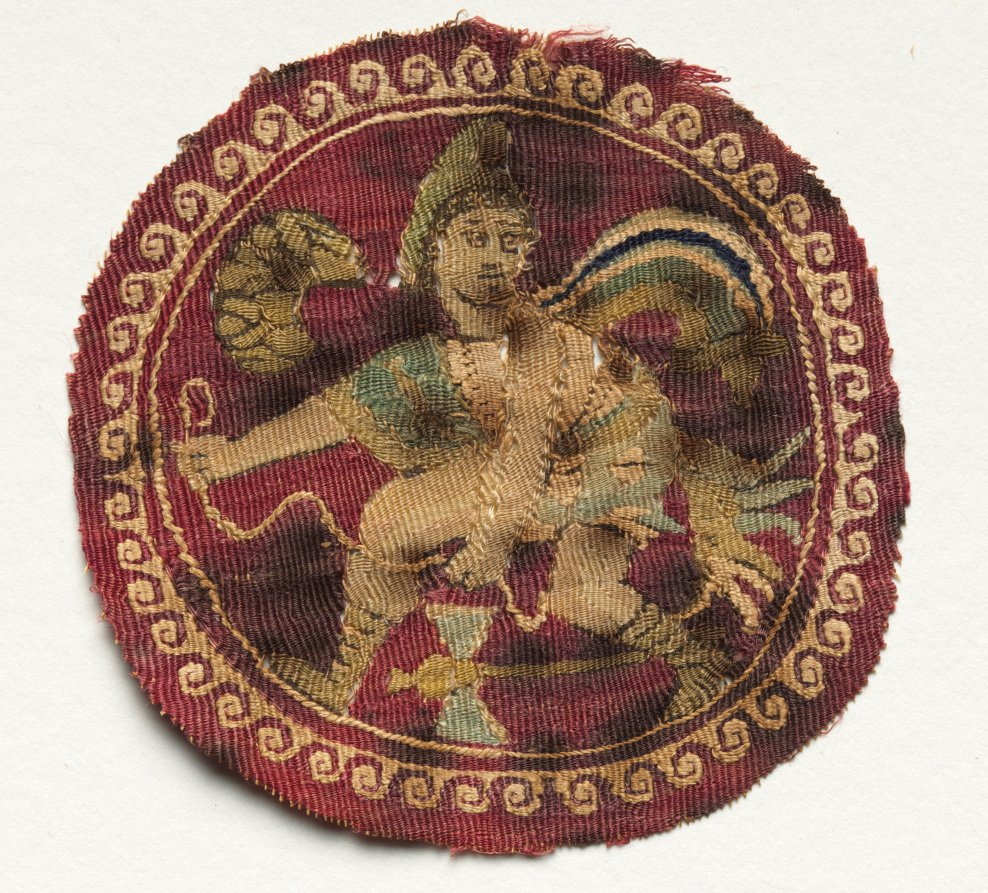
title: Roundel, Segmentum from a Tunic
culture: Egypt, Umayyad period (661–750)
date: mid 600s - mid 700s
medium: tapestry; linen and wool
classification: Textile